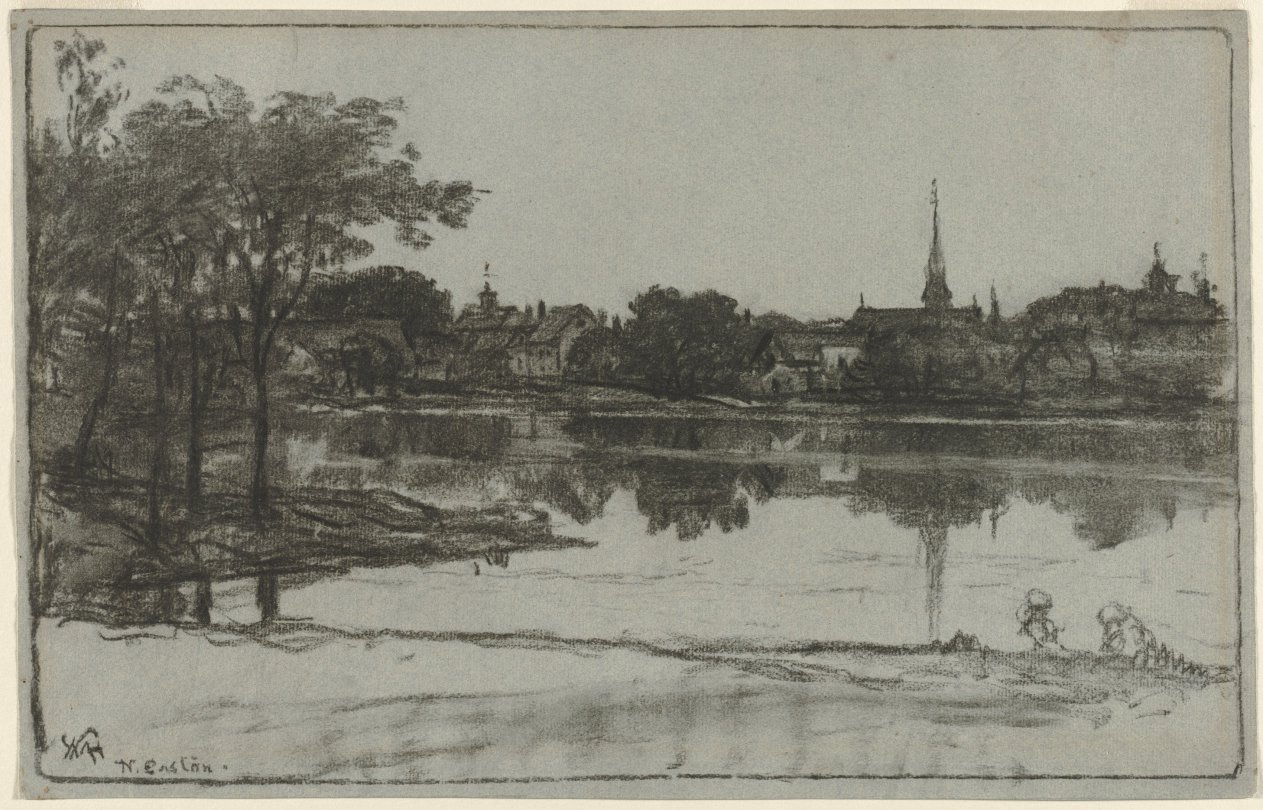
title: North Easton, Massachusetts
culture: America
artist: William Morris Hunt (American, 1824–1879)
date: 1877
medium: charcoal; framing lines in charcoal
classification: Drawing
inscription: signed, lower left, in charcoal: [artist monogram: WMH] N. Easton.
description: Hunt was one of the first American artists to draw with charcoal rather than chalk or graphite pencil. In 1877, he visited North Easton, Massachusetts to paint a portrait of the financier and art patron, Oliver Ames. At this time Hunt made several drawings of the town of North Easton, viewed from across a millpond. This drawing portrays the scene around mid-afternoon. William Morris Hunt (American, 1824–1879)